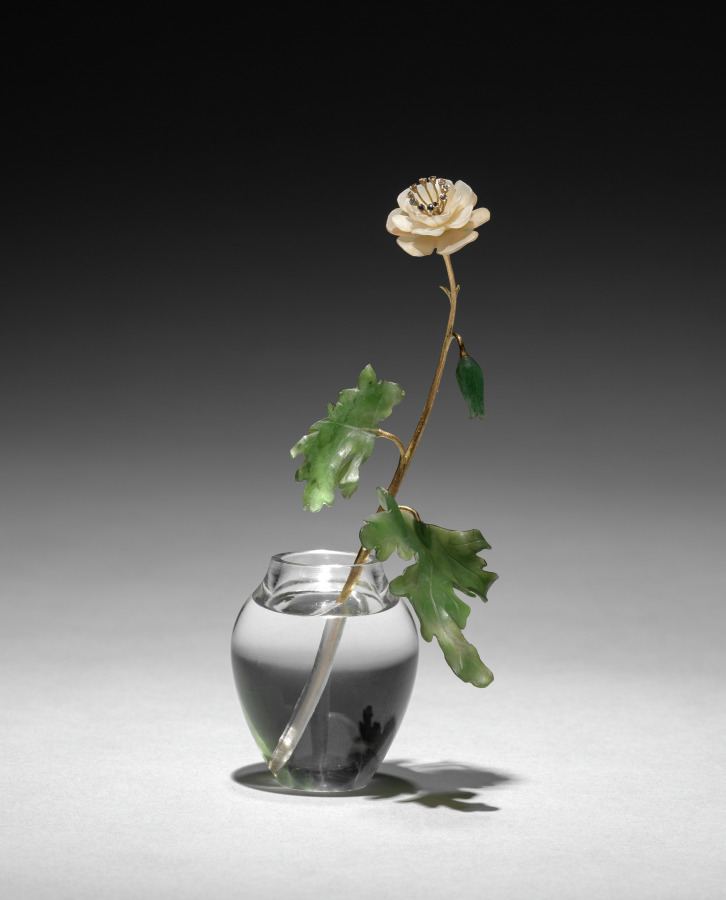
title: Flower Study of an Anemone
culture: Russia, St. Petersburg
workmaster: Henrik Wigström (Russian, 1862–1923)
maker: House of Fabergé (Russian, 1842–1918)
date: c. 1905–15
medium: mat white stone, gold, sapphires, jade, rock crystal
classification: Miscellaneous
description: This flower study depicts a wild anemone in bloom. Fabergé’s inspiration for his flower studies is said to have come from the floral brooches of precious stones that were made in the 1700s for Catherine the Great as well as from the Japanese art of flower arranging, known as ikebana. Small and delicate, Fabergé’s flower studies were given as intimate gifts to friends by the tsarina and others in the court. She also liked to take them around to wherever the imperial family was residing as a reminder of spring during the harsh Russian winters.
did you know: The stems of Fabergé’s flower studies are set into little basins carved from rock crystal to resemble pots of water.